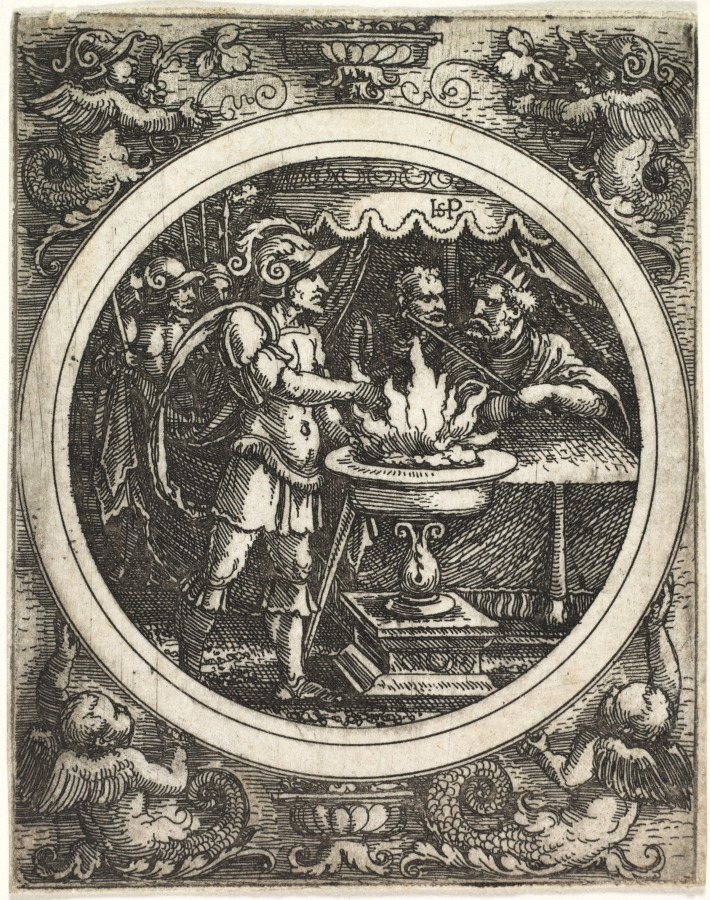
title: Mucius Scaevola Holding His Hand in the Fire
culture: Germany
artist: Hans Sebald Beham (German, 1500–1550)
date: c. 1520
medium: etching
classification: Print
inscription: Verso, collector's stamp in blue ink: CH PROTECTOR MEUS (letters stamped around inside perimeter of an oval with three medlar blooms in center) Verso, along right edge, in graphite: Ch 1-7-80 N 308; left edge in graphite: TOO S 7; bottom edge, in graphite: P. 85; lower center quadrant, in graphite: 84 encircled